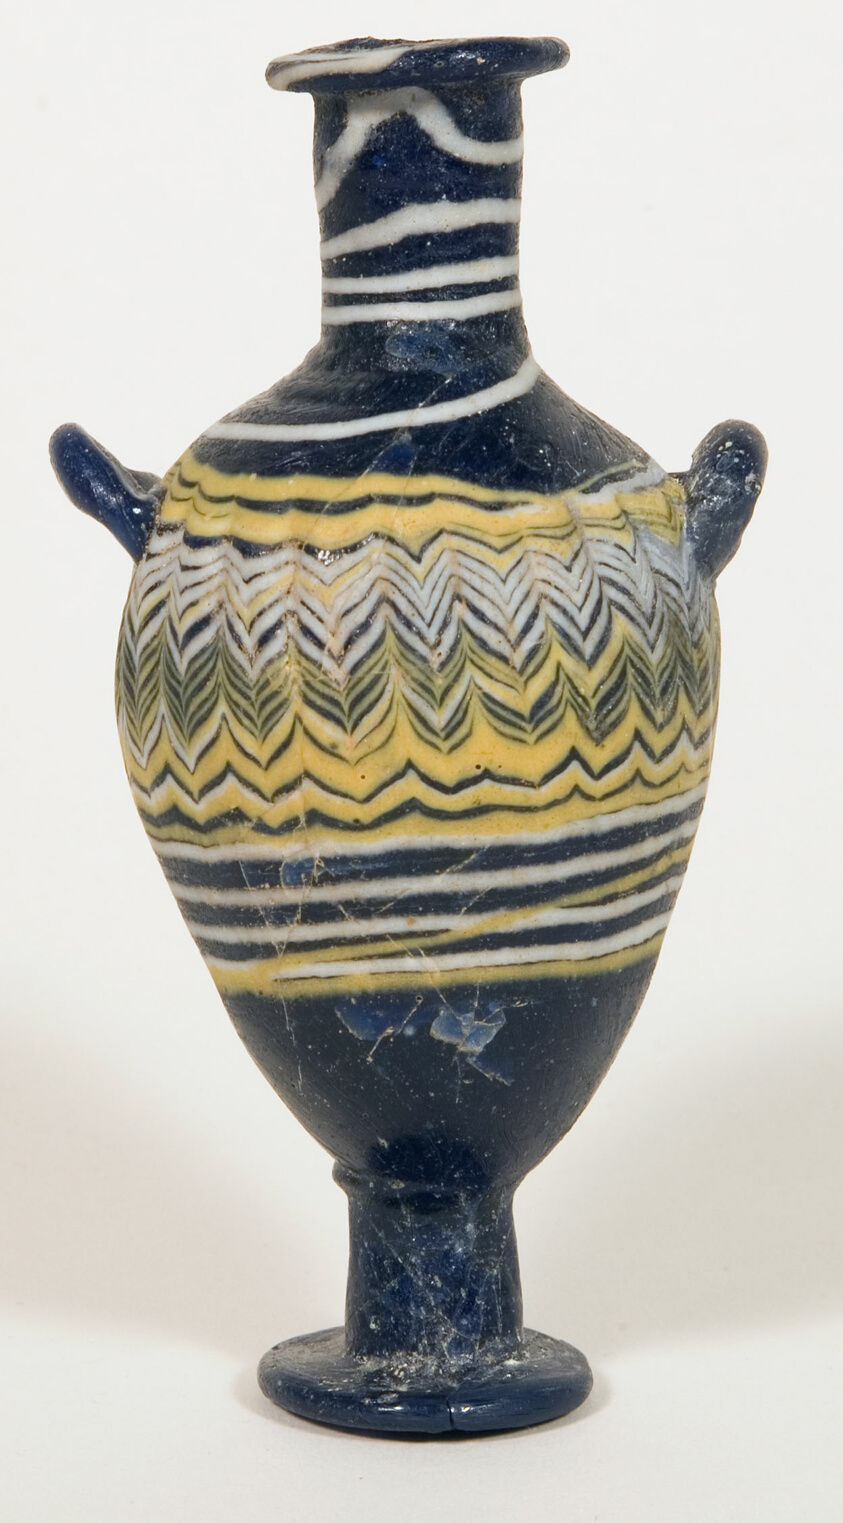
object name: Vessel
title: Bottle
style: late period (egyptian)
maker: Eastern Mediterranean or Italian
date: early 3rd-early 2nd century BCE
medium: Glass, core-formed technique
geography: Eastern Mediterranean Region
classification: bottle; glass; vessel; ancient art